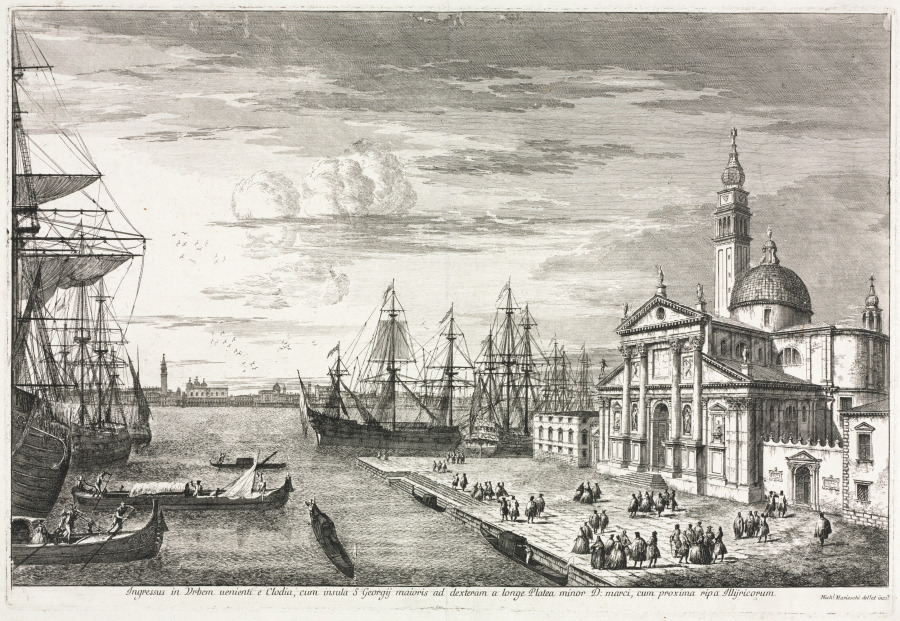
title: S. Giorgio Maggiore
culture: Italy, 18th century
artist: Michele Marieschi (Italian, 1710–1743)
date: 1741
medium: etching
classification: Print